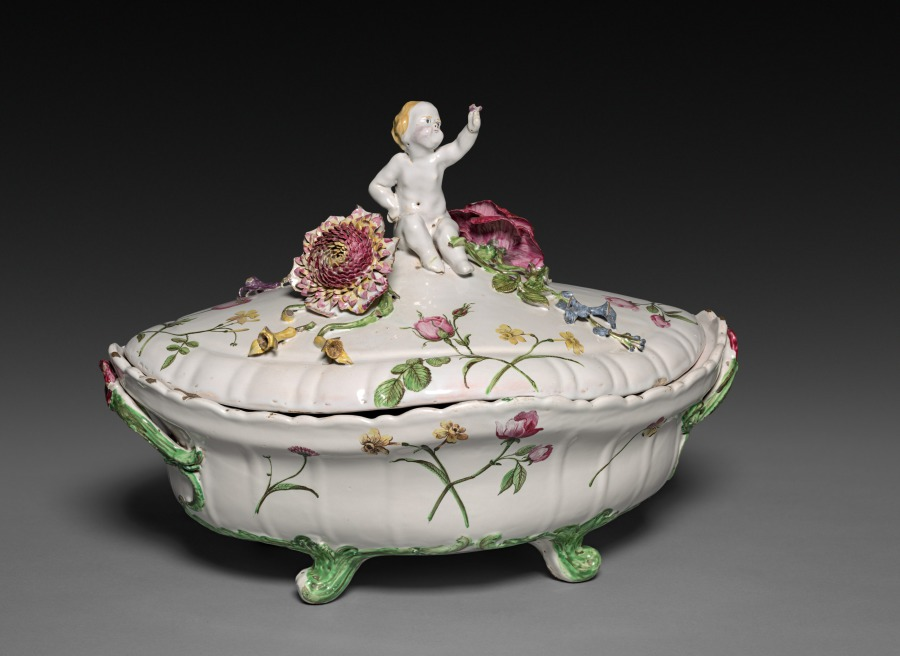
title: Covered Tureen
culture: France, Marseilles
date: c. 1760–70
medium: faience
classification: Ceramic